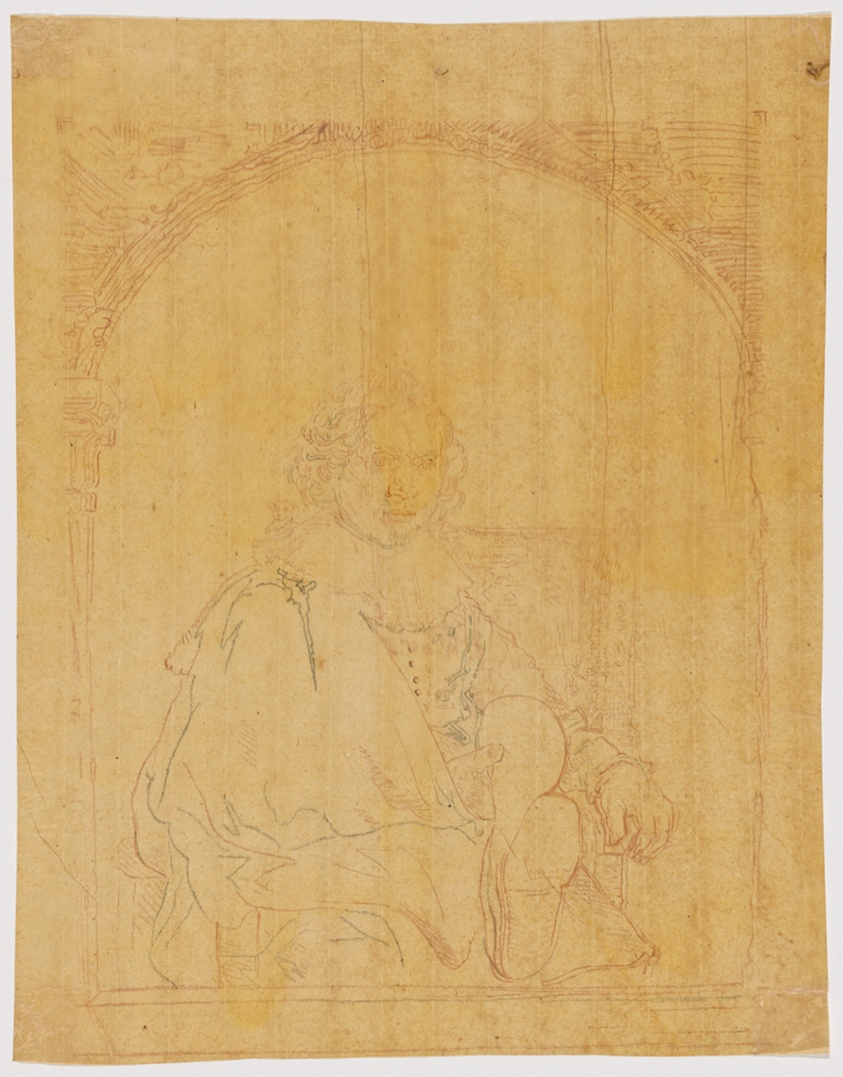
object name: Drawing and Watercolor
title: Portrait of a Man in an Armchair, from Collection d'imitations de Dessins d'après les Principaux Maîtres Hollandais et Flamands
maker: Christian Josi (Dutch, died 1828); after Rembrandt van Rijn (Dutch, 1606-1669)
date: 1826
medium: Tracing in red and black chalk on oiled paper; partially pricked for transfer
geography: Netherlands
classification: chalk; drawings (visual works); prints and drawing